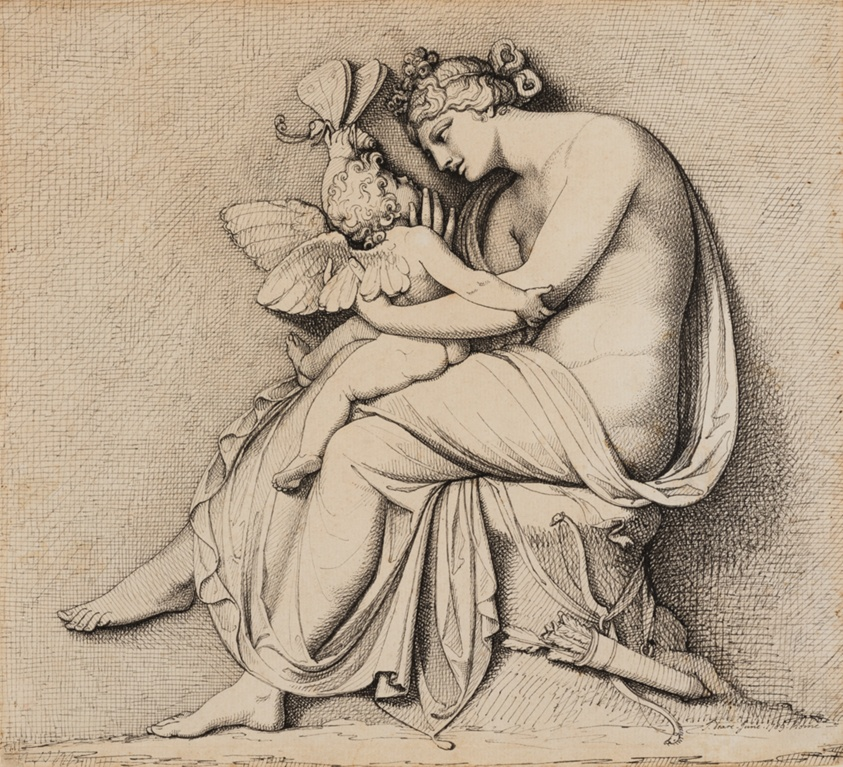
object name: Drawing and Watercolor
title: Venus and Cupid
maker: John Deare (English, 1759-1798)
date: 1789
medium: Pen and black ink on cream laid paper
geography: England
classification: drawings (visual works); prints and drawing